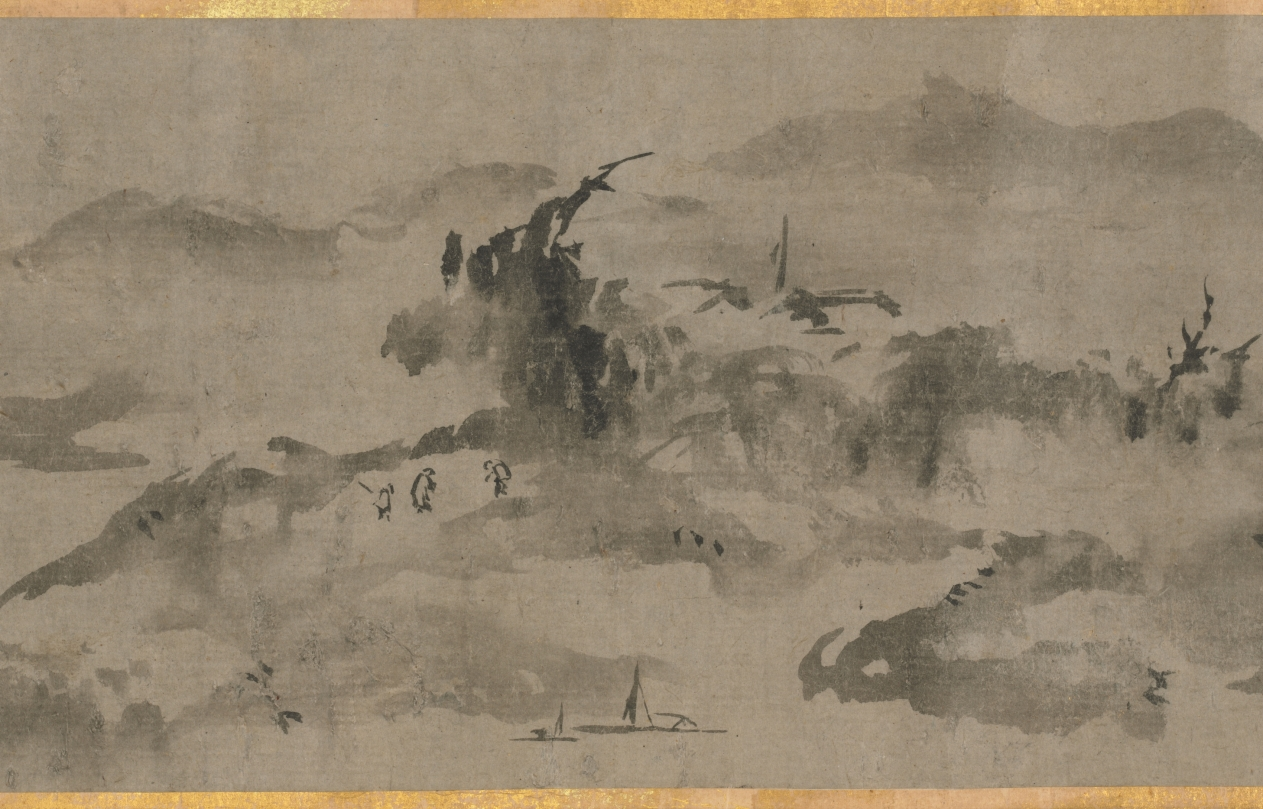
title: Eight Views of Xiao-Xiang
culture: Japan, Muromachi period (1392–1573)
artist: Sesson Shūkei (Japanese, c. 1492–c. 1577)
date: 1500s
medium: handscroll; ink on paper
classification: Painting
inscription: Signature and seal of artist at end of painting.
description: Eight Views of the Xiao and Xiang Rivers can be traced to 11th-century Chinese poems and paintings, the depiction of which had also become popular among Korean and Japanese painters. Xiao-Xiang refers to the region in present-day Hunan province where the Xiao and Xiang rivers converge. Few painters of the Eight Views had in fact seen the scenery; rather, they were trying to portray in ink and wash the lyrical qualities of dim light and a misty atmosphere typical of that region. Each of the poetic titles suggests a time of day, a season, or specific atmospheric conditions—subjects that challenged the abilities of the most talented artists. In this miniature painting (shukuzu) of the Muromachi period, Japanese Zen monk and painter Shukei Sesson depicted all eight views featured in Chinese prototypes: Wild Geese Descending to Sandbar; Returning Sails Off a Distant Coast; Mountain Market in Clearing Mist; River and Sky in Evening Snow; Autumn Moon over Dongting Lake; Night Rain on the Xiao and Xiang; Evening Bell from Mist-Shrouded Temple; and Fishing Village in Evening Glow.